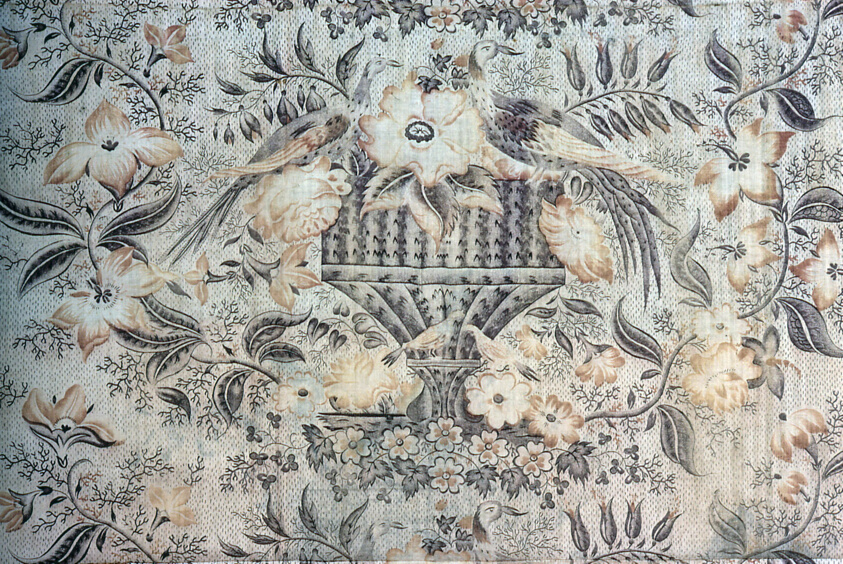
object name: Textile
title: Panel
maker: England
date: c. 1850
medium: Cotton, plain weave; probably roller printed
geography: England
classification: textile; weaving - printed